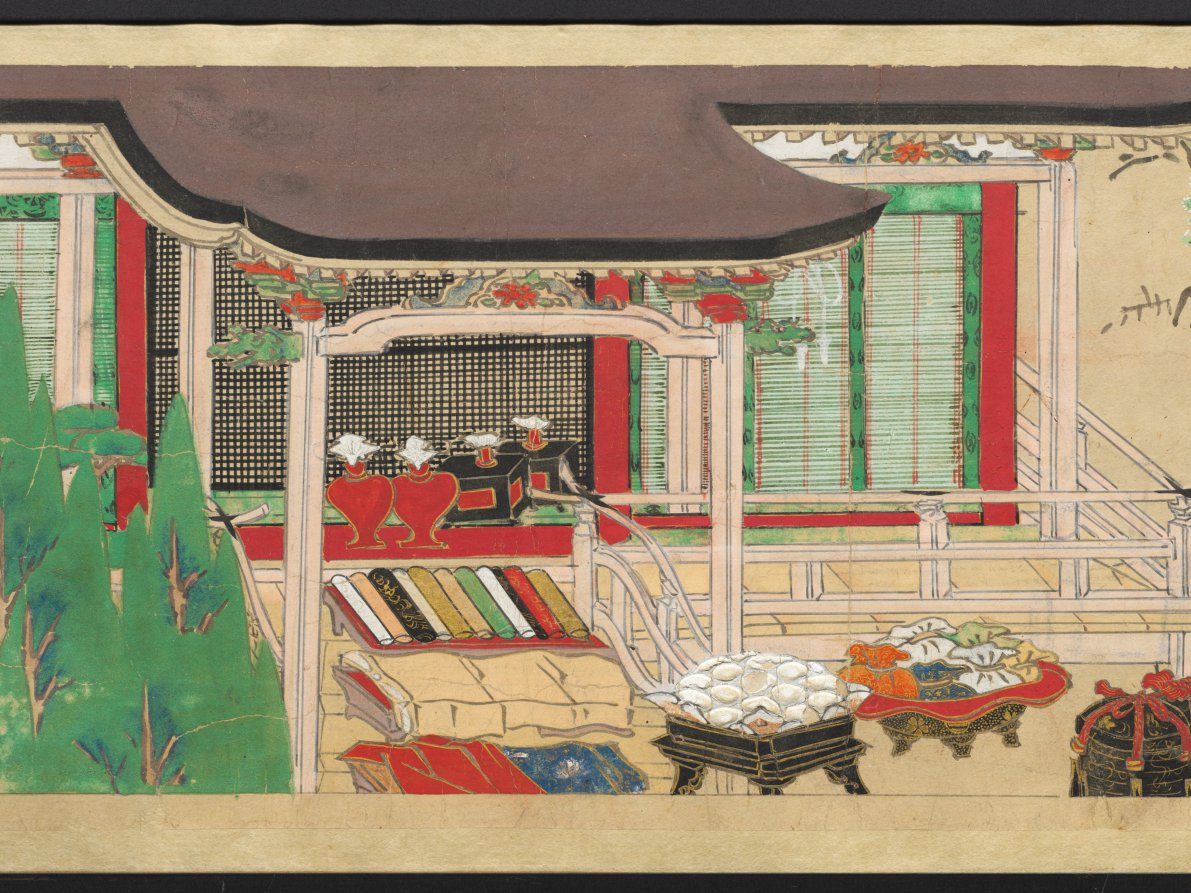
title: The Saltmaker's Story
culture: Japan, Edo period (1615–1868)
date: early 1600s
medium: One of a pair of handscrolls; ink, color, and gold on paper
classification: Painting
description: Once read and copied by girls at New Year’s celebrations and included in dowries, The Saltmaker’s Story is a rags-to-riches tale in which daughters are gifts from the gods. Despite his simple outlook, the main character progresses from humble roots as an associate at Kashima Shrine to the elite status of grandfather of the emperor through the intervention of the Kashima deity. The Saltmaker’s Story is traditionally presented in a set of three scrolls, but the text of this set has been removed by a previous owner, who remounted the illustrations as a pair. The paintings of this one take us from right to left through the first half of the tale.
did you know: This handscroll originally had texts before its paintings, but the texts were removed.